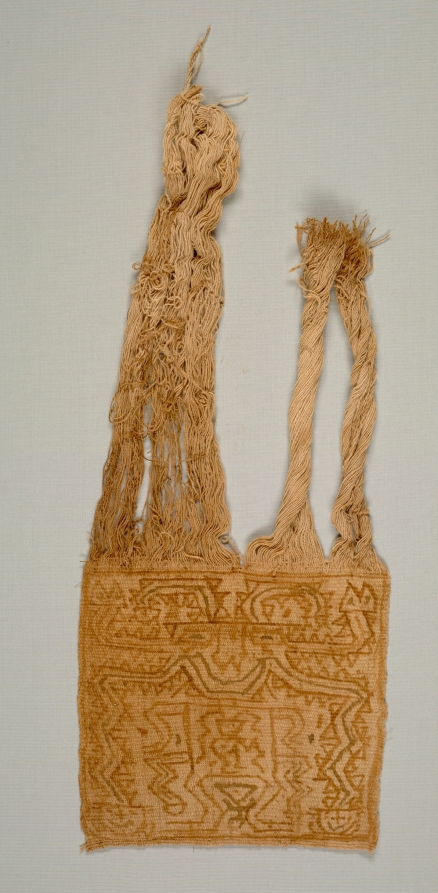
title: Mummy Bundle "Mask"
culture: Peru, South Coast, Ica Valley, Ocucaje site, Paracas style (700 BCE–1 CE)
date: 400–200 BCE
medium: Cotton and pigment; plain weave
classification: Textile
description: The Paracas people buried their dead in bundles that they created by carefully wrapping the seated human body in layers of garments and other textiles. In some cases, they placed a painted cloth—such as these examples—on the outer layer and at the top of the bundle. The hair-like yarns (unwoven warps) were arranged around a solid cotton disk that was sometimes wrapped with a headband. The cloths, then, seem to have functioned as the bundle’s head, even though some are painted not with faces but with complete figures whose supernatural character is marked by the appendages streaming from their bodies.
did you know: These masks fall into two categories, those with only a face and those with a full-bodied figure.